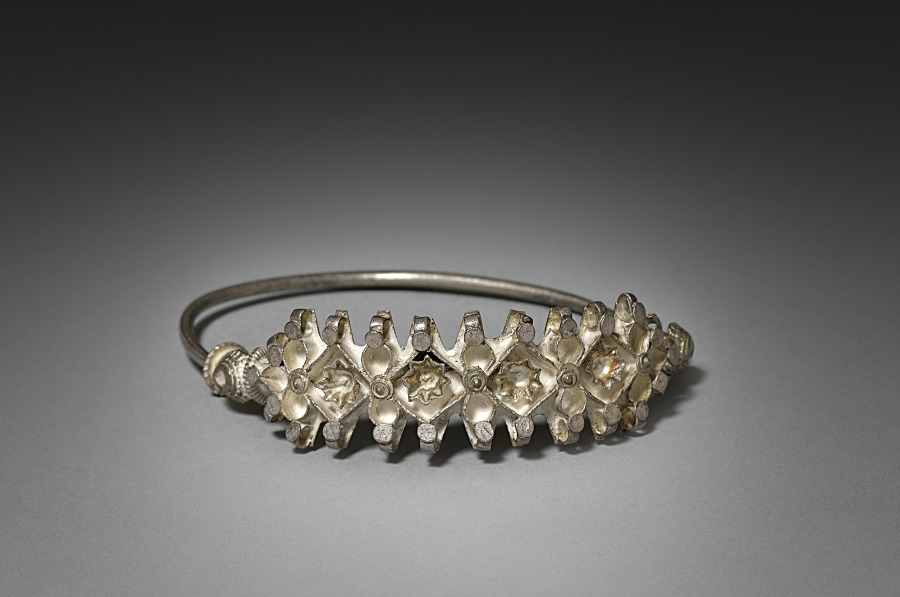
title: Nose Ring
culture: India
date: early 1900s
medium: silver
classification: Jewelry